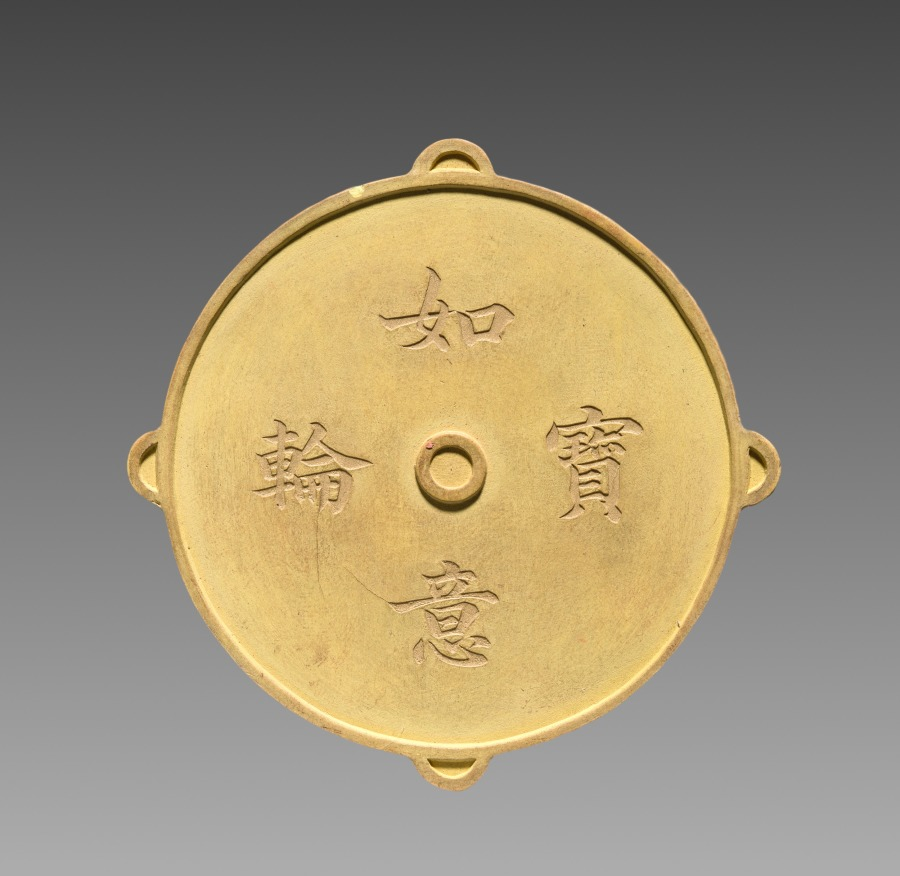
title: Box with Ink Cakes: Yellow Ink Stick in Shape of a Buddhist "Wheel of the Law"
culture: China, Qing dynasty (1644-1911), Jiaqing reign (1795-1820)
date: 1795–1820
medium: Molded ink in yellow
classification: Miscellaneous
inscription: 如意寶輪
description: Ink cakes (also called ink sticks) are dissolved with the addition of water and then ground on the surface of a flat square stone into liquid ink for painting and calligraphy. The precious ink cakes here, however, have never been used. The inscription on the side of the blue ink cake says that the set was commissioned by Chen Huai, Governor of Jiangxi Province.